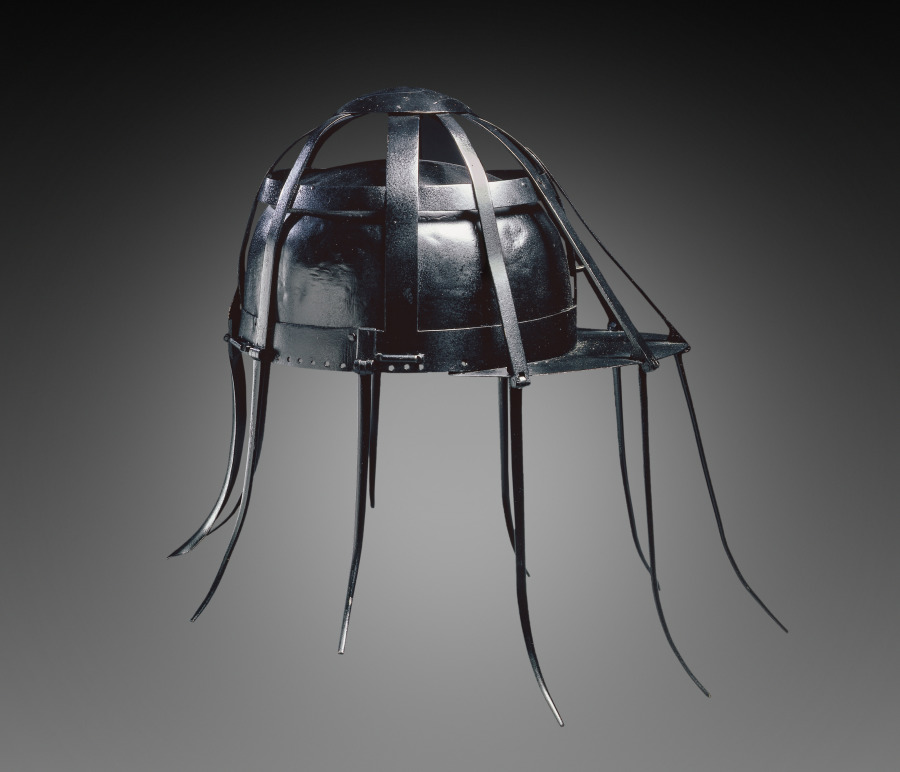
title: Cavalry Spider Helmet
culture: France, 17th century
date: 1600s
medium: iron with black paint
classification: Arms and Armor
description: The "spider-like" legs of this helmet protected the mounted soldier's face and head from slashing sword blows. The legs could be raised and locked up out of the way when not required.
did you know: This helmet was made specifically for use in the field by the light cavalry who wore only a half suit of armor, sturdy riding boots, and an open helmet.